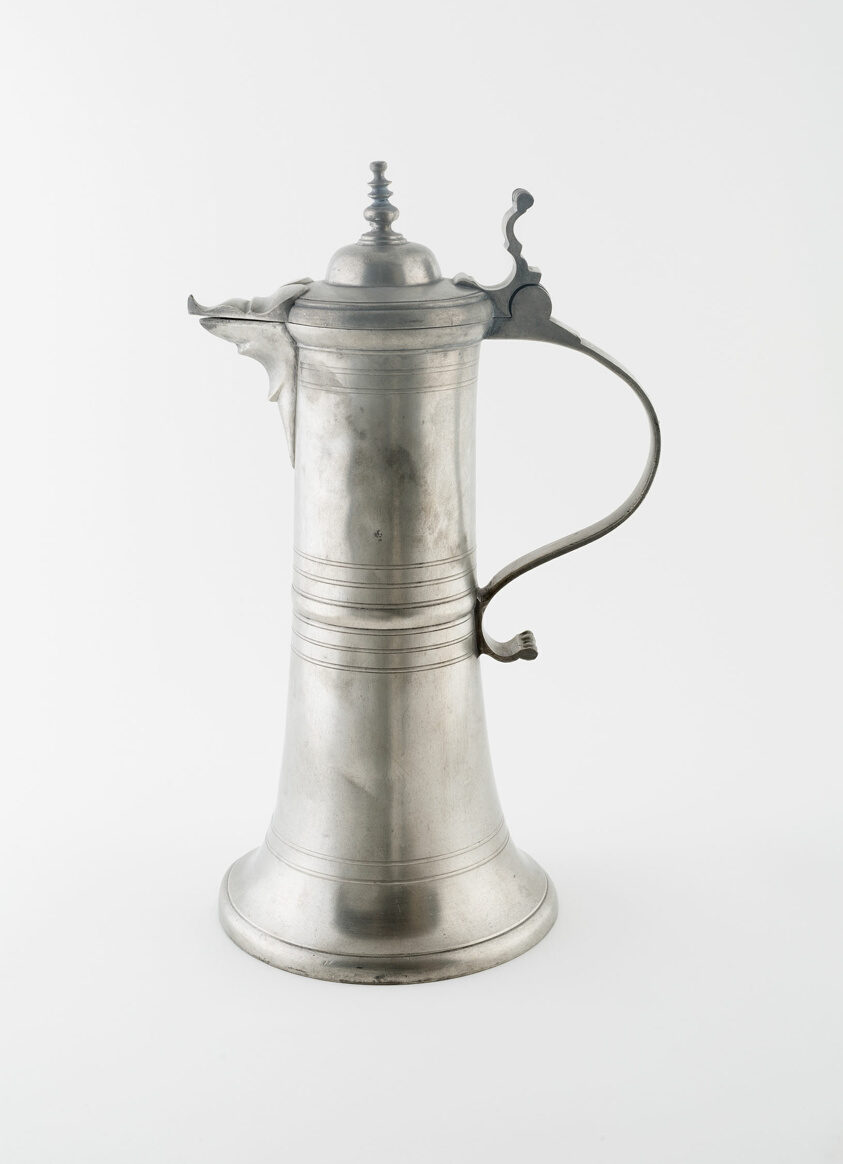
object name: Metalwork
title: Covered Flagon with Spout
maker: Possibly Andreas Wirz; Zurich, Switzerland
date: 1750/1800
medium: Pewter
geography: Zürich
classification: pewter; metalwork; european decorative arts